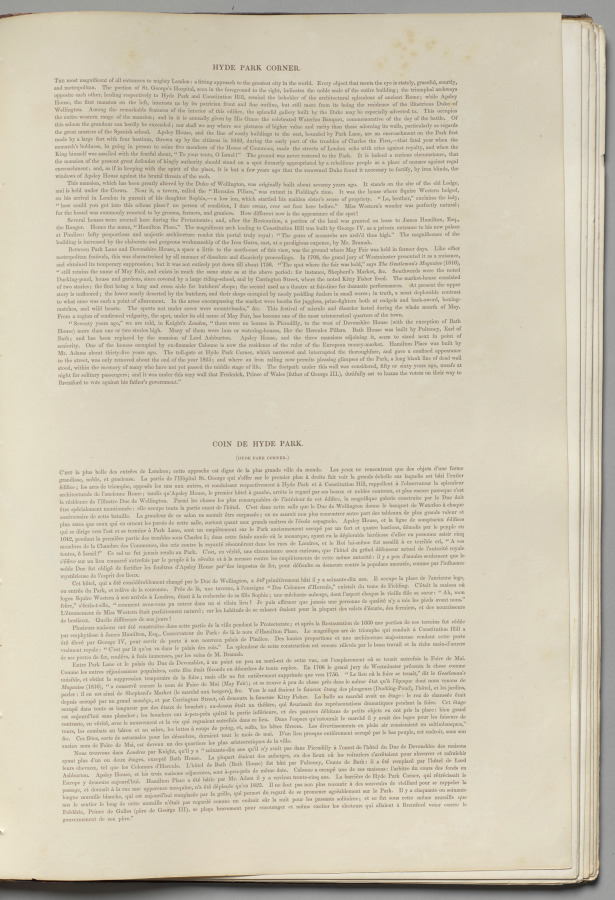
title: London As It Is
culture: England, 19th century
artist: Thomas Shotter Boys (British, 1803–1874)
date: 1842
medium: lithograph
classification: Bound Volume